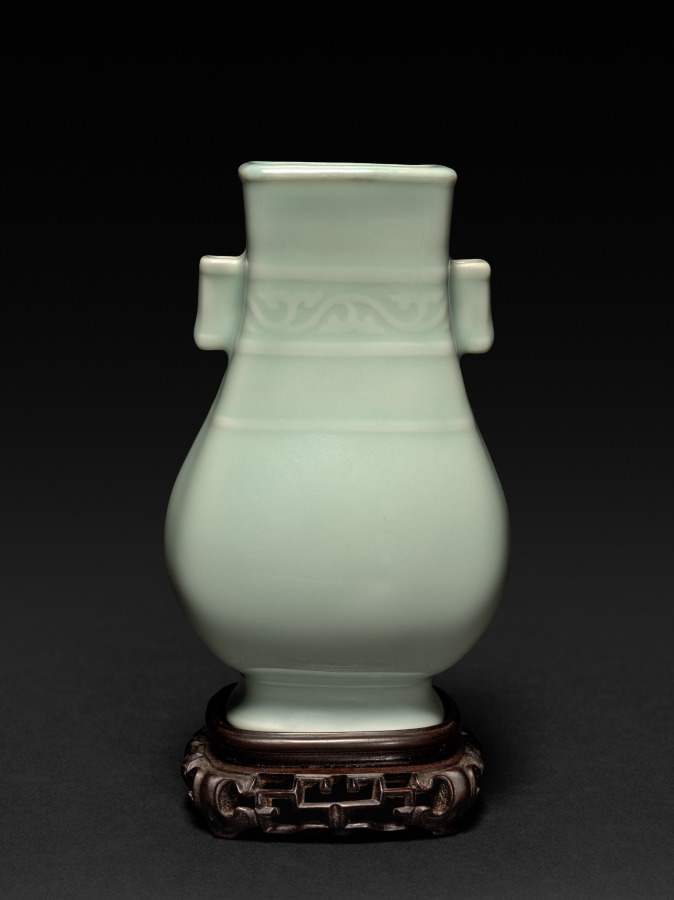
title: Vase in Form of Archaic Hu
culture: China, Jiangxi province, Jingdezhen kilns, Qing dynasty (1644-1911), Qianlong mark and reign (1736-95)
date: 1736–95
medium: porcelain with celadon glaze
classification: Ceramic